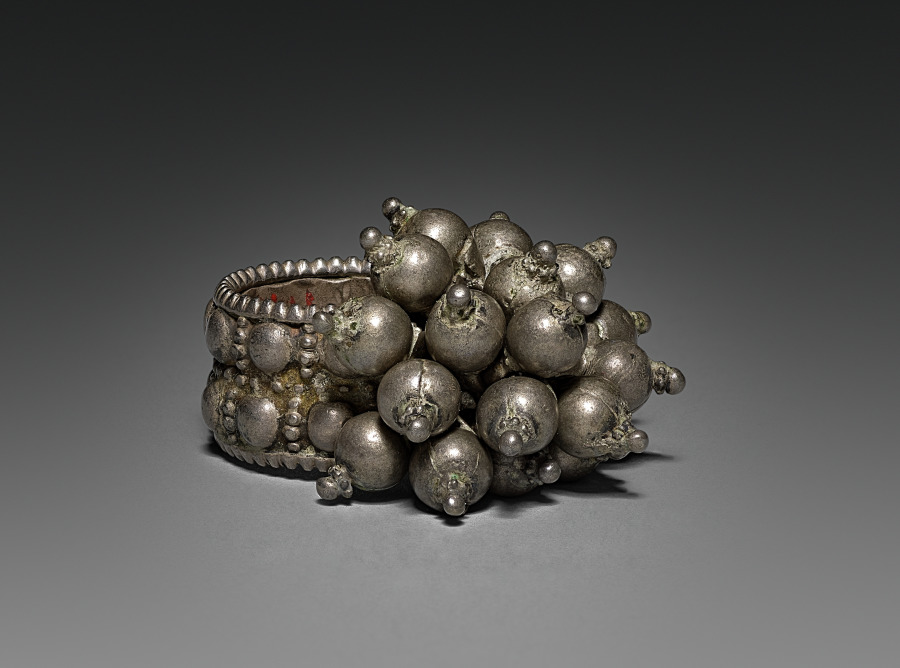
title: Toe-ring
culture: India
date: 1800s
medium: silver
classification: Jewelry